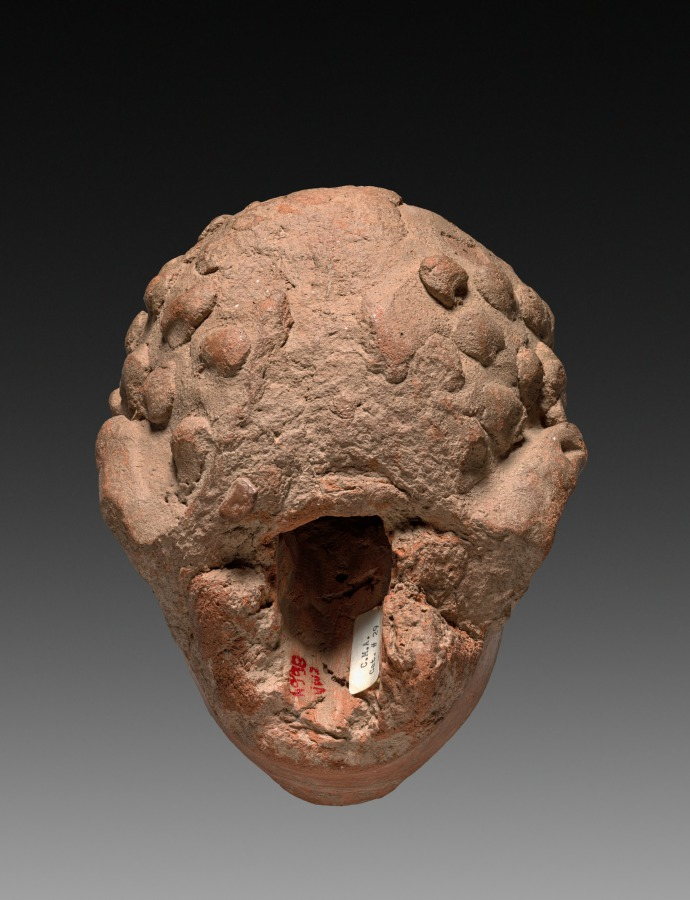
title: Head of Buddha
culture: India, Kashmir, Akhnur school, 8th century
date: 700s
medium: Clay, accidentally burned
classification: Sculpture